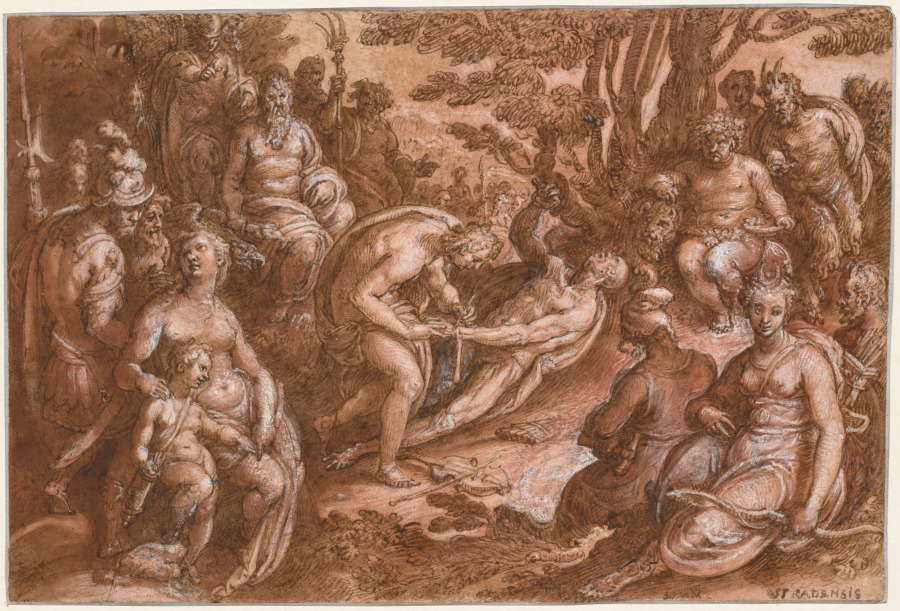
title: The Flaying of Marsyas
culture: Netherlands, 16th - 17th century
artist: Jan van der Straet, called Johannes Stradanus (Netherlandish, active Italy, 1523–1605)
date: c. 1570–1605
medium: Pen and brown ink and brown and red washes, heightened with white paint (or gouache), on paper prepared with red washes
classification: Drawing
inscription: Inscribed LR in pen and ink “Strada. / STRADENSIS”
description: In this gruesome mythological scene, Apollo begins to flay, or peel the skin off, the satyr Marsyas as punishment for his arrogant challenge in a musical contest. The surrounding Olympian gods show reactions ranging from horror to fascination. The artist Johannes Stradanus helped found the Accademia delle Arti del Disegno (Academy of the Arts of Drawing) in Florence in 1563, which instituted a course of training for artists that included observing a human dissection. In making this image, Stradanus very likely understood the flaying of Marsyas as a metaphor for the importance of dissection and anatomical study to the artist.